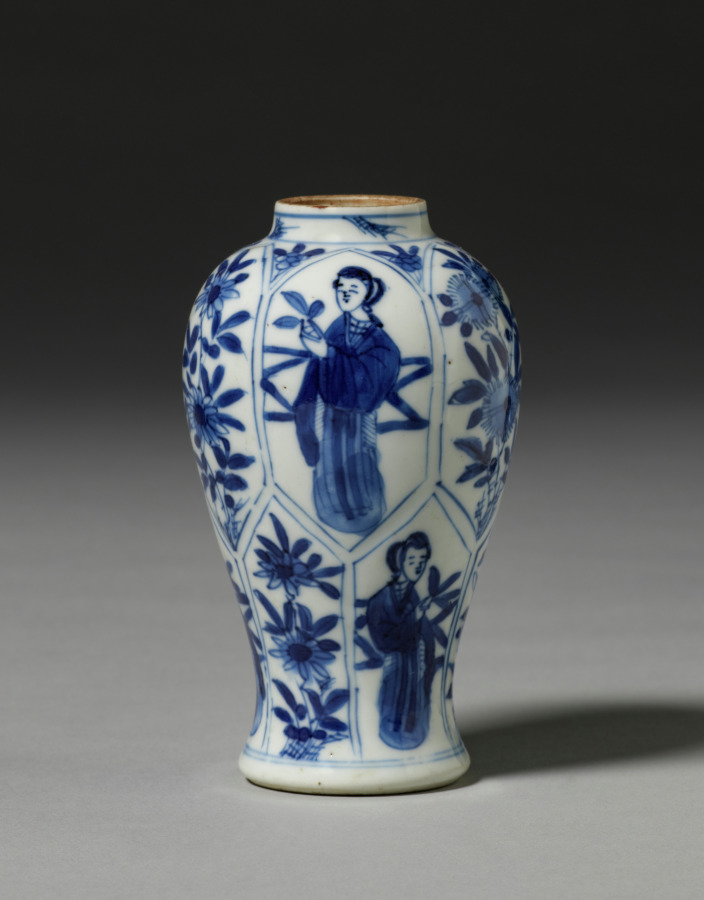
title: Jar with Cover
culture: China, Qing dynasty (1644-1911)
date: 19th Century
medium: porcelain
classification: Ceramic